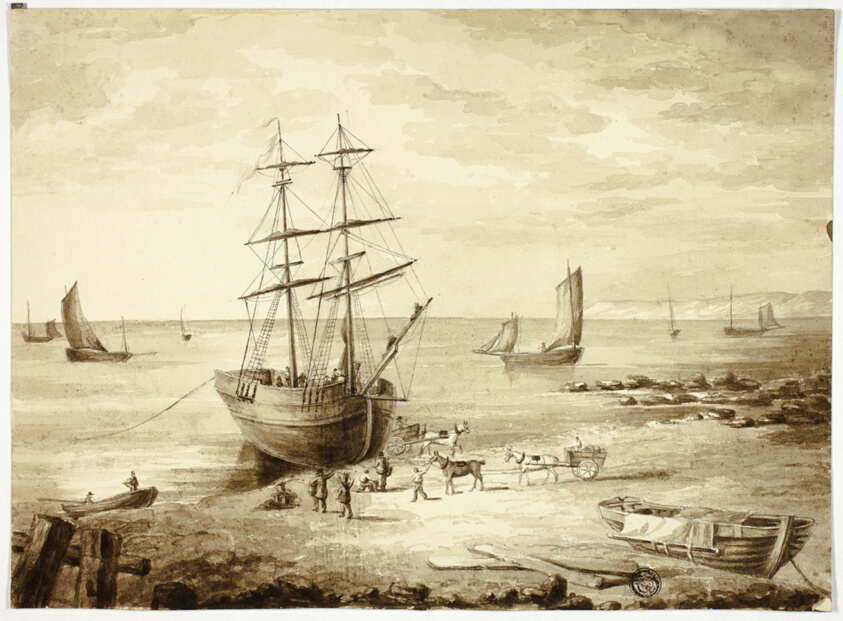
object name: Drawing and Watercolor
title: Loading Boat in Port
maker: Elizabeth Murray (English, c. 1815-1882)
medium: Brush and brown ink and wash, over graphite, on cream wove paper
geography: England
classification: ink or chalk wash; drawings (visual works); prints and drawing